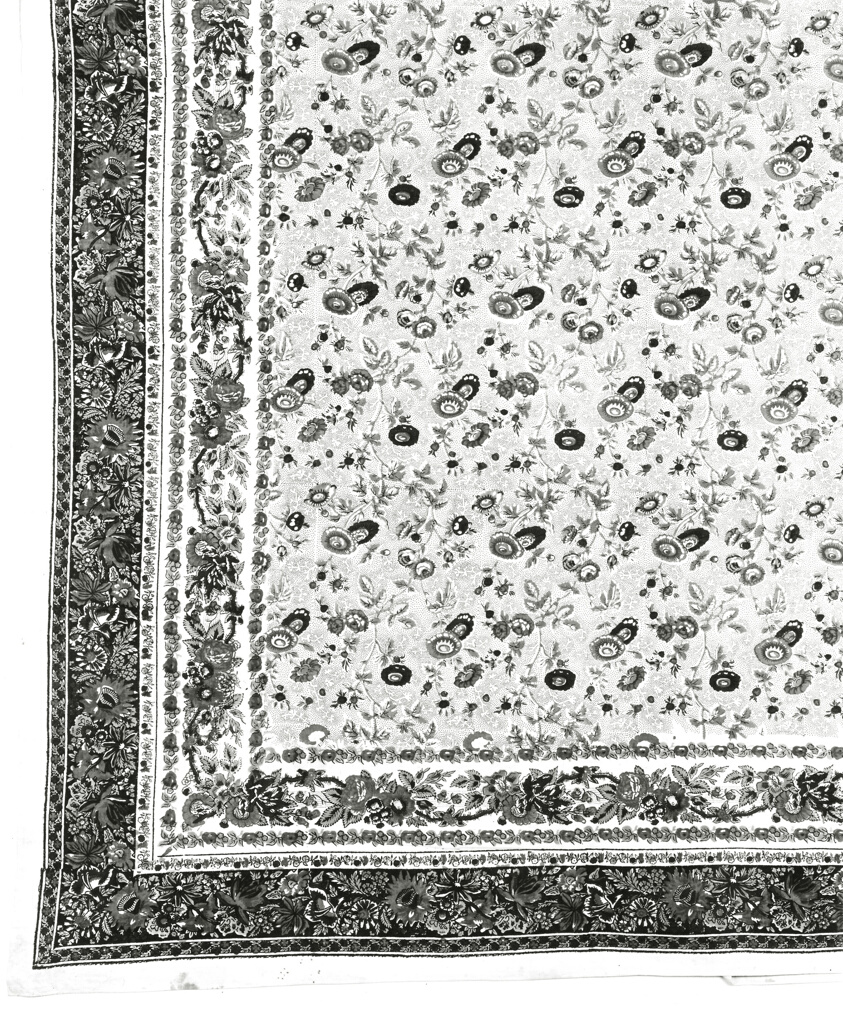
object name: Textile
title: Panel (Possibly shawl or bedspread)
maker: France or England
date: 19th century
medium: Cotton, plain weave; block printed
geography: France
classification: textile; weaving - printed; weaving